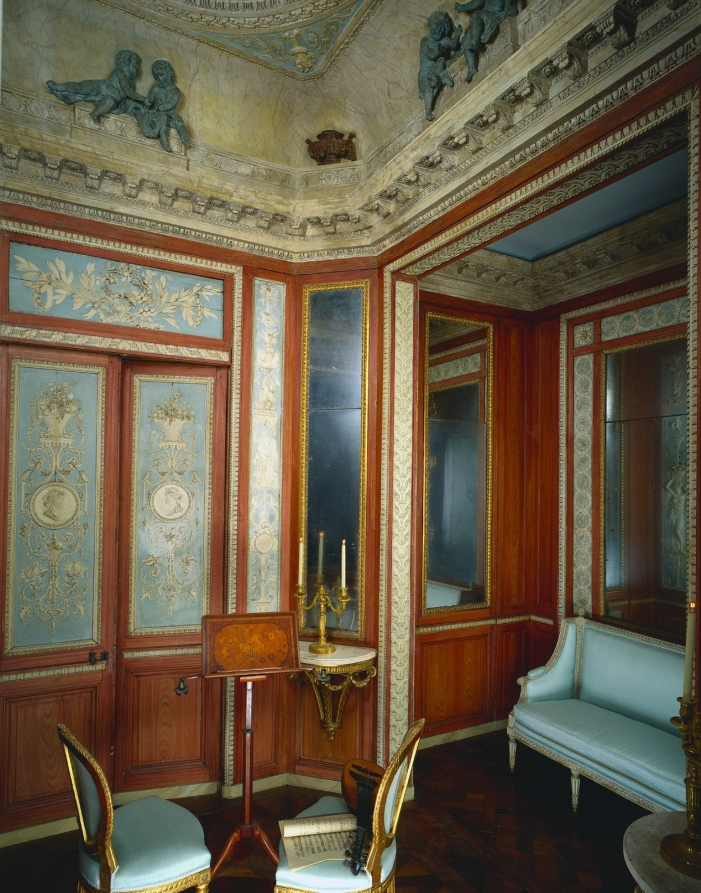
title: Boudoir from Hotel d'Hocqueville, Rouen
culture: France, 18th century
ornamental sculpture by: attributed to Fixon Firm (French)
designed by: attributed to François Guéroult (French, 1745–1804)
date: c. 1785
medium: wood and plaster, in part painted and gilded, window and mirror glass, marble table tops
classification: Furniture and woodwork